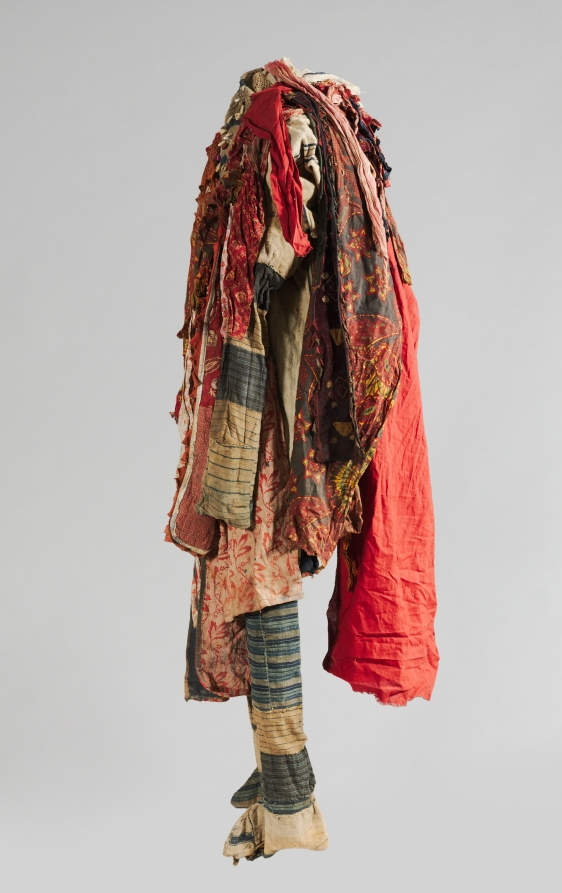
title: Egúngún Masquerade Dance Costume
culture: Africa, West Africa, Nigeria, Yorùbá-style maker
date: 1900s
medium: cotton, velvet, flannel, dye, faux fur, leather, cowrie shells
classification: Mask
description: Swirling into motion, egúngún masquerade costumes appear during annual festivities to bless the community. Manifesting ancestral spirits, they serve as a bridge between the living and the otherworld. The fabric panels create a dwelling place for ancestral spirits. Arranged and selected according to Yorùbá design sense (ojú-ọnà), this mask incorporates hundreds of African, Asian, and European fabrics. These include imported damasks, velvets, faux furs, and embroideries, as well as local indigo-dyed cottons.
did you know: The striped netting on the "face" of this masquerade costume allows the wearer to see out while keeping their identity concealed.